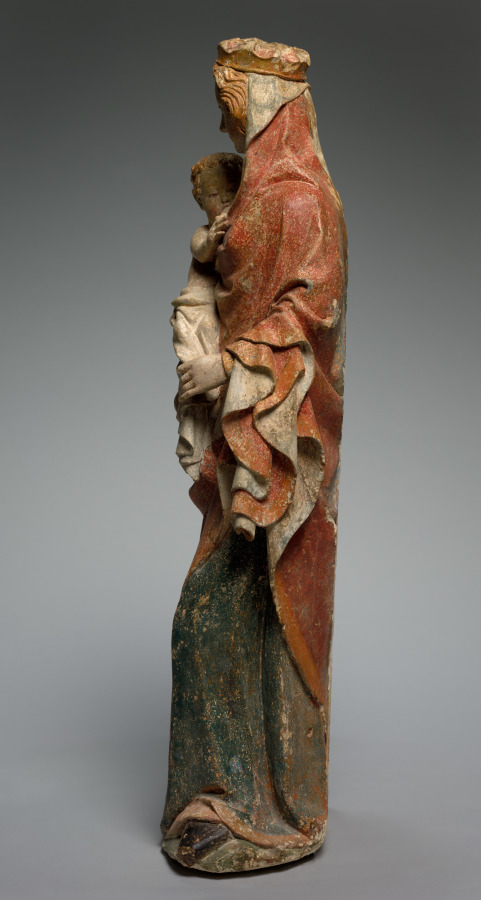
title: Virgin Nursing the Christ Child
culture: France, Île de France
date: c. 1370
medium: painted limestone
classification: Sculpture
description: This sculpture of the Virgin Mary nursing the Christ child subtly emphasizes the intimate relationship between mother and child and brings the Son of God in his human existence closer to the viewer. The emotional interaction is characteristic of sculpture since the mid-1300s, especially in the circles close to the court of the French kings in Paris and Emperor Charles IV (reigned 1346–78) in Prague. These novel stylistic tendencies were possibly a reaction to the fear and uncertainty incurred by the first great plague wave in 1348.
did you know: The back of this sculpture is unfinished since it would have originally been placed against a wall or pier.